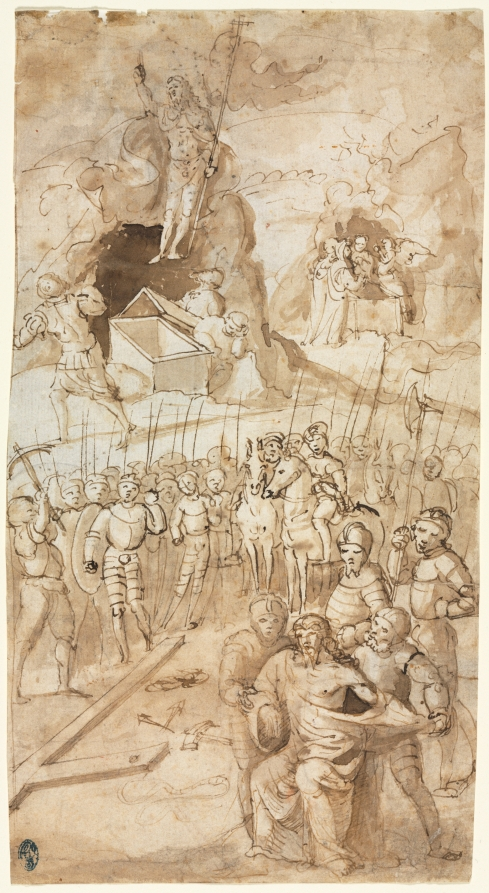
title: Three Scenes from the Passion of Christ (recto)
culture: Northern Italy, 16th century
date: 1500s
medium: pen and brown ink and brush and brown wash over traces of black chalk; framing line (left edge) in brown ink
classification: Drawing